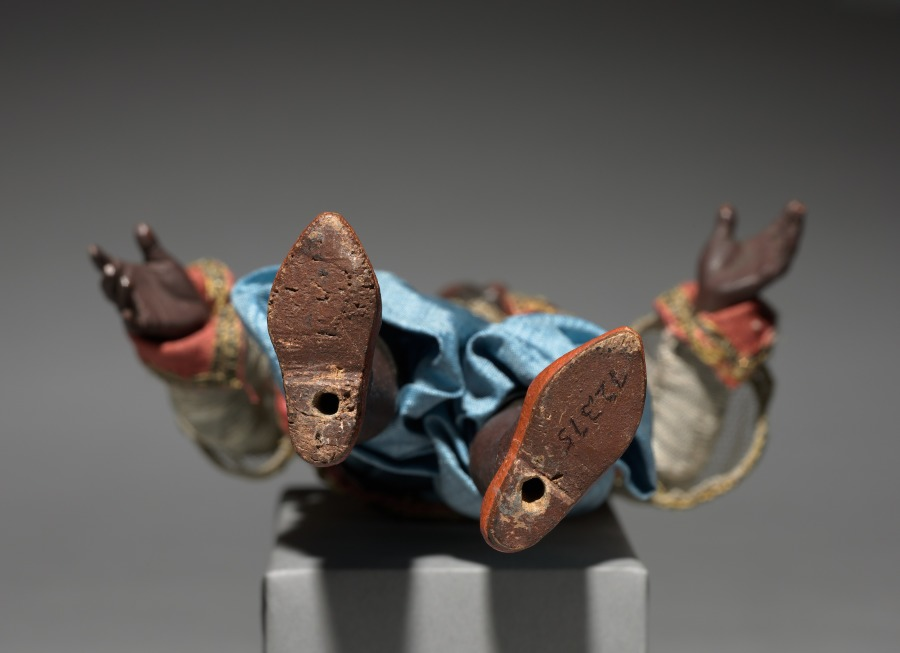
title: Figure from a Crèche: Attendant of the Magi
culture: Italy, Naples, late 18th-early 19th century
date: 1780–1830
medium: painted wood and terracotta with various textiles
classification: Sculpture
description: The practice of creating scenes of the Nativity for the home dates from the early 1700s in Italy, where people began to set up doll-like figures of about a foot or less in height. The custom was particularly popular in Naples around 1800, where crèche scenes (crèche means cradle, or crib) included many figures, whose heads and hands of painted terracotta, stuffed cloth bodies, and clothing adapted from contemporary local costumes gave them an amazingly realistic character. Representations of the birth of Jesus can be traced to the first few centuries of Christianity. Both living creatures and sculptural depictions of them were used from early times. By the late middle ages it was customary to create life-size figures of wood or stone, naturalistically painted, to represent the characters who participated in the events of Jesus's early life. These sculptures were then arranged in scenes illustrating one or both of the most important of these events, the Adoration of the Shepherds and the Adoration of the Magi-the three kings from the East who came to pay homage to the Christ child. Used in churches, these large figures were especially popular in Italy, Central Europe, Spain, and Portugal. This Object in Focus presentation was organized by Henry Hawley, Curator of Renaissance and Later Decorative Arts and Sculpture.